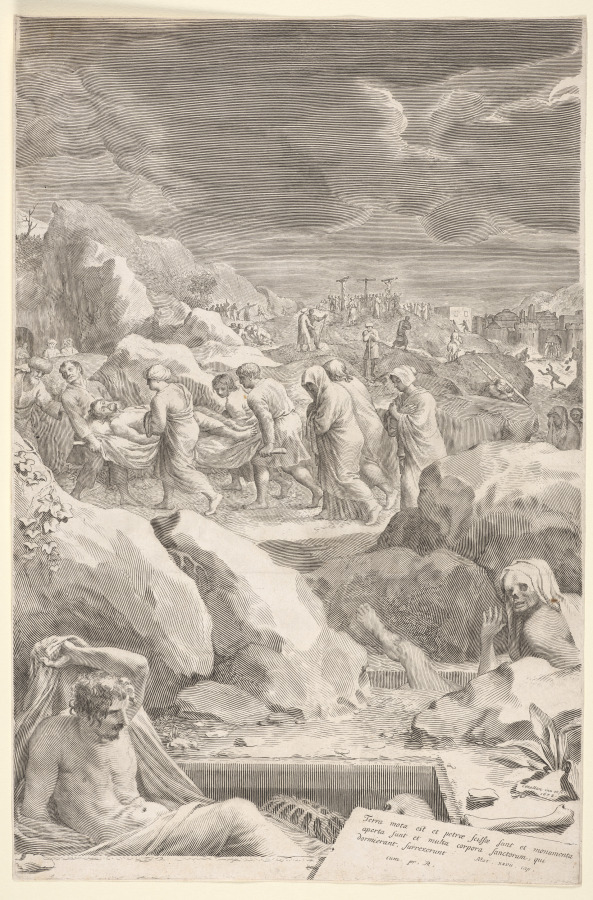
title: Christ Carried to the Tomb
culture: France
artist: Claude Mellan (French, 1598–1688)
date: 1678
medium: engraving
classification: Print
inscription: WATERMARK: bunch of grapes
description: The French engraver Claude Mellan spent time in Rome, where he developed a unique engraving style that uses simplified linear patterns and swelled lines to create optical, almost abstract effects. He created Christ Carried to the Tomb later in his career, when he had fully developed his linear approach to engraving, using swelled lines alone, without the use of crosshatching. The subject of Christ’s burial procession was somewhat unusual among works of the period, and Mellan went further to highlight a lesser-known passage from the biblical book of Matthew in the foreground that describes the resurrection of saints after Christ’s death on the cross. This rather obscure subject matter aligned with Mellan’s emphasis, throughout his career, on presenting engravings that offered something unique and extraordinary to his audience of collectors.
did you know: The foreground figure was portrayed using swelled lines that terminate at the edge of the form, creating the optical illusion of contour lines.